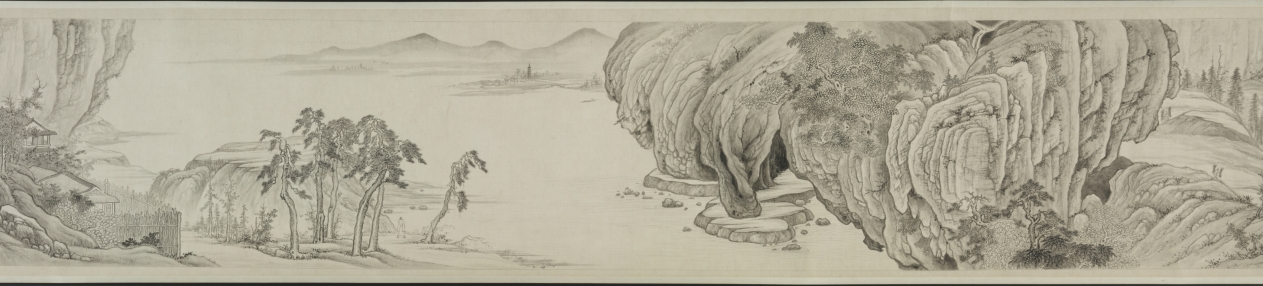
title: Meditative Visit to a Mountain Retreat: In Picture and in Words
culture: China, Ming dynasty (1368–1644)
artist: Xiang Shengmo (Chinese, 1597–1658)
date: 1648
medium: handscroll; ink on paper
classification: Painting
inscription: Artist's title and 3 seals (in front of painting): [title] Meditative Visit to a Mountain Retreat: In Picture and in Words 巖栖思訪圖詠 [3 seals] Tian lai ge zhong wen sun 天籟閣中文孫; Xiang shi kong zhang zui xin han mo 項氏孔彰醉心翰墨; Qing fu yuan zhong di yi miao ye 清福緣中第一妙業.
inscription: [印] 兔烏叟; 考古正今. 觀斯人兮何逍遙，非逍遙兮思其友。 思其友兮天一方，欲一訪之難回首。 松耶柏耶稱後凋，巖穴霏微何二酉。 山兮水兮人悠悠，遠莫致之神交否？ 河關一向望不及，言笑于今更非偶。 問游魚兮樂何深？問飛鳥兮歸何藪？ 問猿鶴兮何親疎？問鹿豕兮何夭壽？ 問白雲兮從何來？問流泉兮向何走？ 問漁樵兮何江山？問草木兮何畝畎？ 問春秋兮何炎涼？問世人兮何長久？ 問日月兮何晦明？曾見當時烏兔叟？ 戊子嘉平之初偶作此圖并題。 胥樵項聖謩識。 [印] 兔烏叟; 項氏孔彰; 未喪斯文.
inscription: 13 additional seals: 4 of Tang Zuomei 唐作梅 (late 18th–19th century); 3 of Zhang Baixi 張百熙 (1847–1907); 4 of Zhang Heng 張珩 (1915–1963); 2 unidentified.